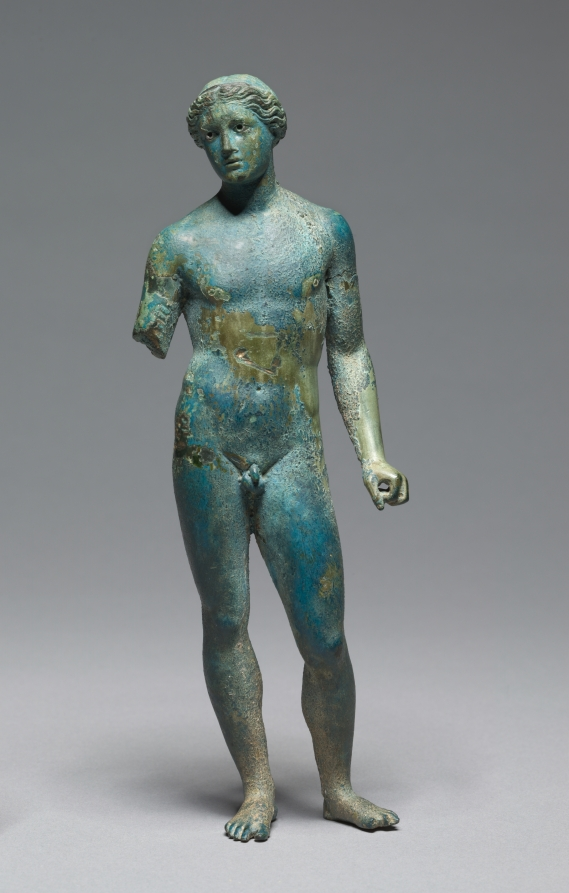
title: Athlete or Apollo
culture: Greece, Macedonia(?)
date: probably 100–1 BCE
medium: bronze with silver inlays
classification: Sculpture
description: This bronze statuette depicts a nude male, perhaps a young athlete or the youthful god Apollo. The figure is made from solid bronze, with a fillet of inlaid silver on his head. The figure’s right arm is broken off just above the elbow. If this is a statue of Apollo, he may have once held a bow and arrow; if it depicts an athlete, he could have held athletic equipment, a symbol of victory, or an offering dish.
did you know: The eyes of this figure are decorated with inlaid silver.